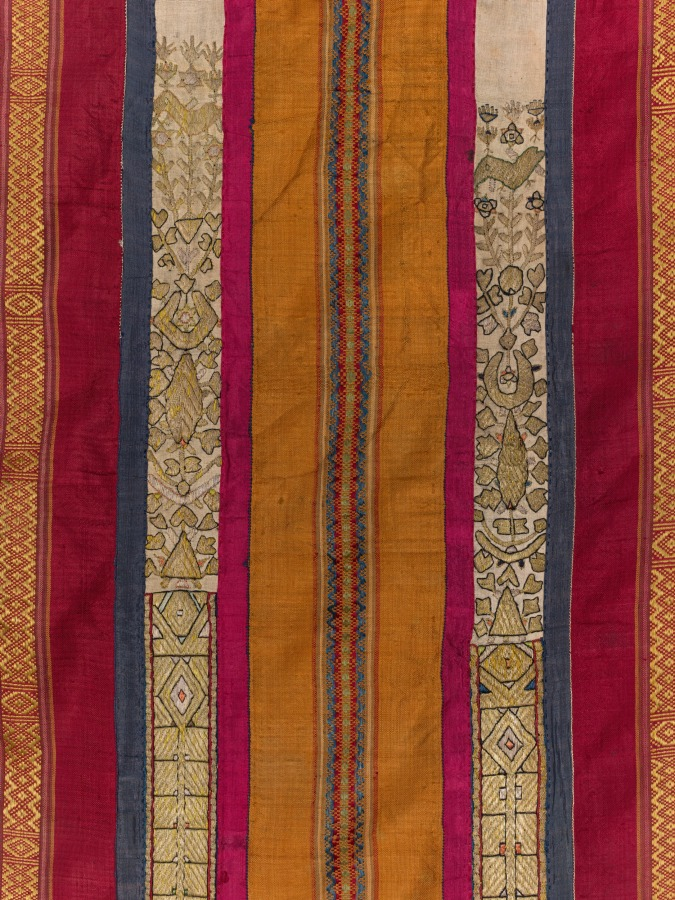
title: Curtain (one of a pair)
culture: Africa, North Africa, Tunisia, Djerba, Tunisian weaver(s) and embroiderer(s)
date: 1600s–1700s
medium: Silk, linen, metal, and dye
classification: Embroidery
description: One of a pair, this curtain displays colorful silk bands with woven geometric motifs, and cream bands with gold-embroidered plants, birds, six-pointed stars, and the khamsah (خمسة), an open five-fingered hand. Birds and the tree of life were popular good luck or fertility symbols linked to marriage. This curtain’s cosmopolitan motifs would have resonated with Jews, Muslims, and Christians alike, reflecting its creation on multiethnic and multireligious Djerba, an island off the Tunisian coast. There, both goldsmithing and gold thread embroidery were done by Jewish artisans (male and female, respectively). The fine materials suggest this curtain once hung in a wealthy home or for special occasions; interior wall hangings were typically made from rough wool.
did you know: When first acquired over a century ago, this curtain had fringe at its lower end.